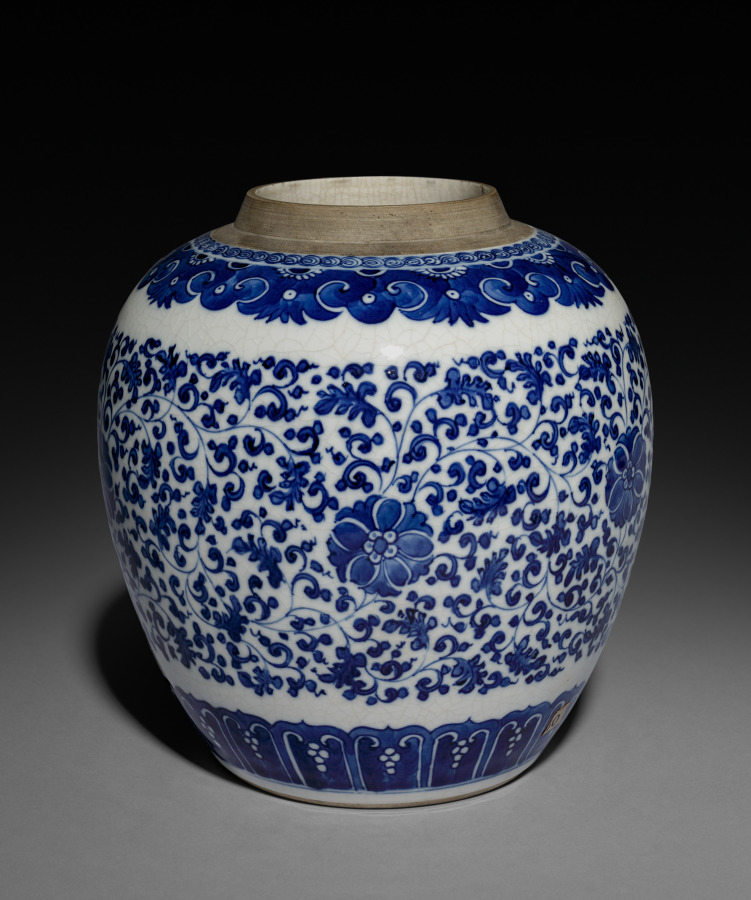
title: Ginger Jar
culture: China, Qing dynasty (1644–1911), Qianlong reign (1736–95)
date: 1736–95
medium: porcelain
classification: Ceramic